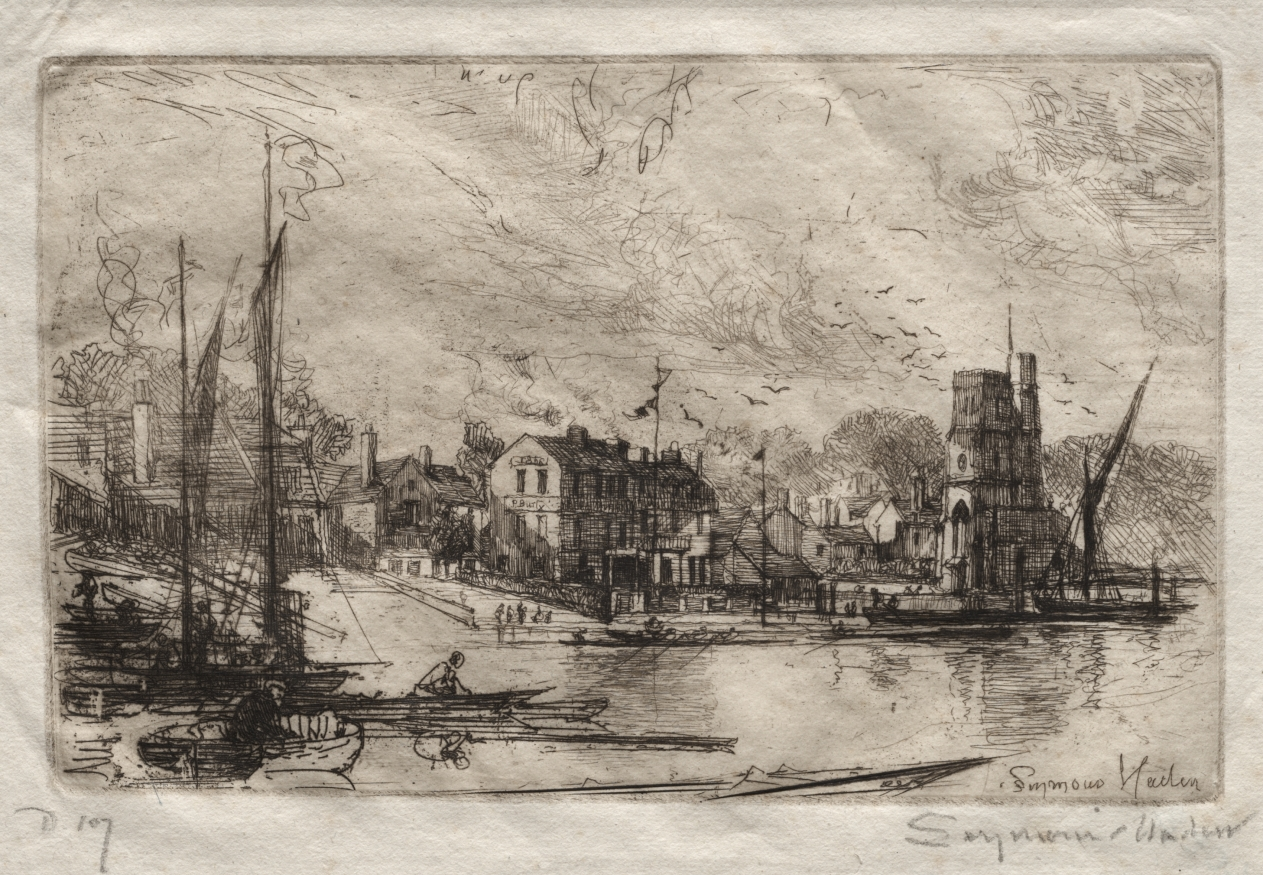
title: Harry Kelly's, Putney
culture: England, 19th century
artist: Francis Seymour Haden (British, 1818–1910)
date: 1865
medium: etching and drypoint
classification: Print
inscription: inscribed in graphite below image: Seymour Hayden (l.r.); D107 (l.l); inscribed in graphite in lower left corner of sheet: 1802; inscribed in plate: Seymour Hayden (l.r.)